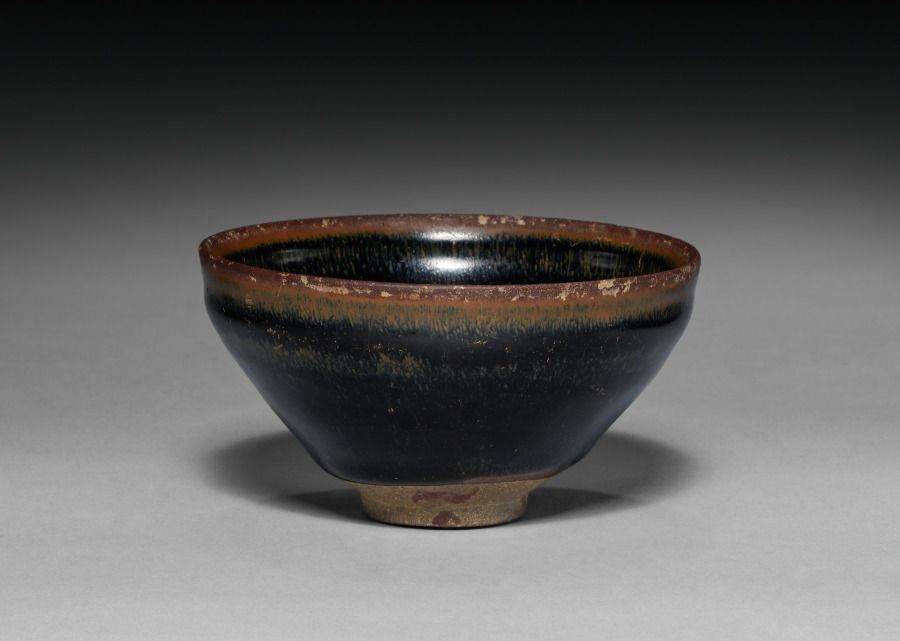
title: Black-Glazed Teabowl with Incised Characters (供御) for “Imperial Tribute”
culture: China, Fujian Province, Southern Song dynasty (1127-1279)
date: 1100s–1200s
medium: Brown-glazed stoneware, Jian ware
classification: Ceramic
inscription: 供御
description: Teabowls with incised characters are rare. The characters 供御 (gongyu; “imperial tribute”) incised on the base of this bowl suggest that it was local annual tribute ware presented to the court. The abrasions on its rim indicate the cup was originally mounted with a metal ring that has been removed. Teacups, occasionally dressed with metal bands to cover the rough, thinly glazed lip, enhanced the experience of tasting tea and rendered the bowl more precious and appealing. When steeped tea leaves were introduced in China, dark-glazed bowls fell out of favor, but such bowls continued to be treasured in Japan where powdered tea (matcha) remained popular.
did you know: Jian ware was commonly associated with tea drinking and tasting, as the light color of tea contrasted nicely with the dark glazes of the ceramics.